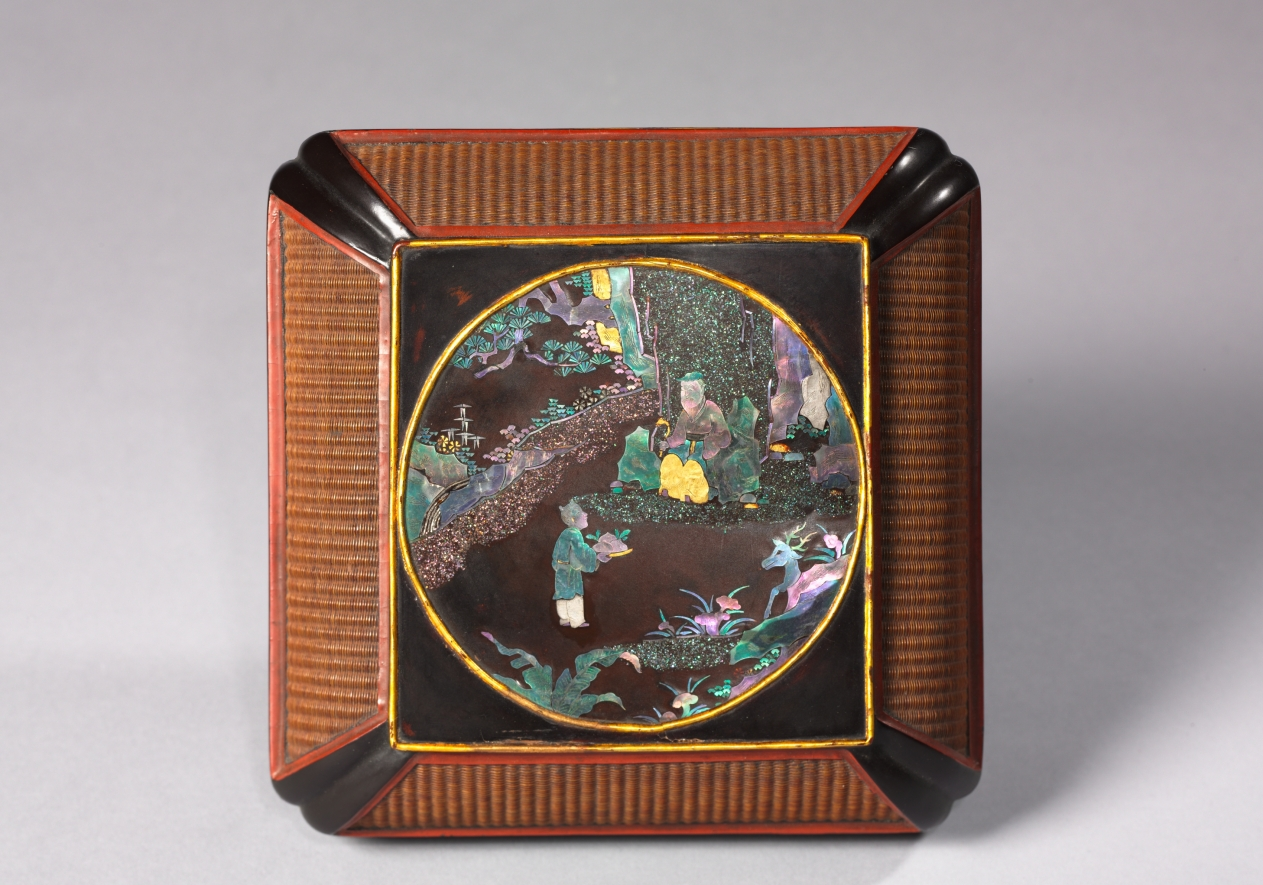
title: Wickerwork Box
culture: China, Ming dynasty (1368-1644), Wanli reign (1572-1620)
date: 1609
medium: lacquered wickerwork (of woven bamboo) framed in wood with circular scene inlaid in mother-of-pearl and gold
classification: Lacquer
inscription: Inscription at bottom in red on black lacquer reads: "commissioned by Yü-Yün-ch'i".